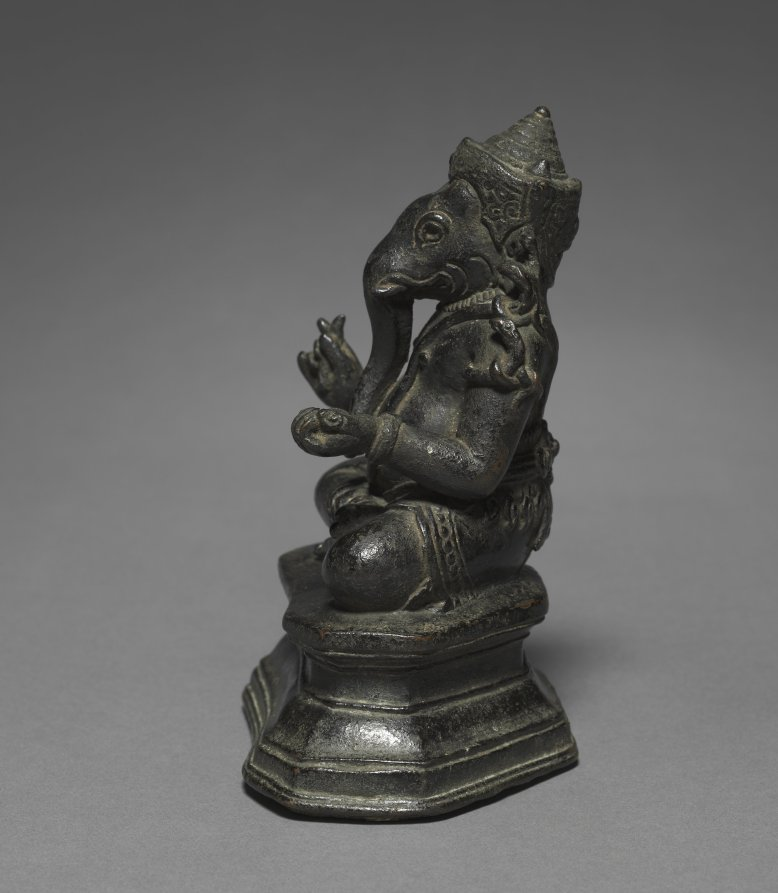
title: Seated Two-armed Ganesa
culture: Cambodia, Angkor Wat Period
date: late 1100s-early 1200s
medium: bronze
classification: Sculpture